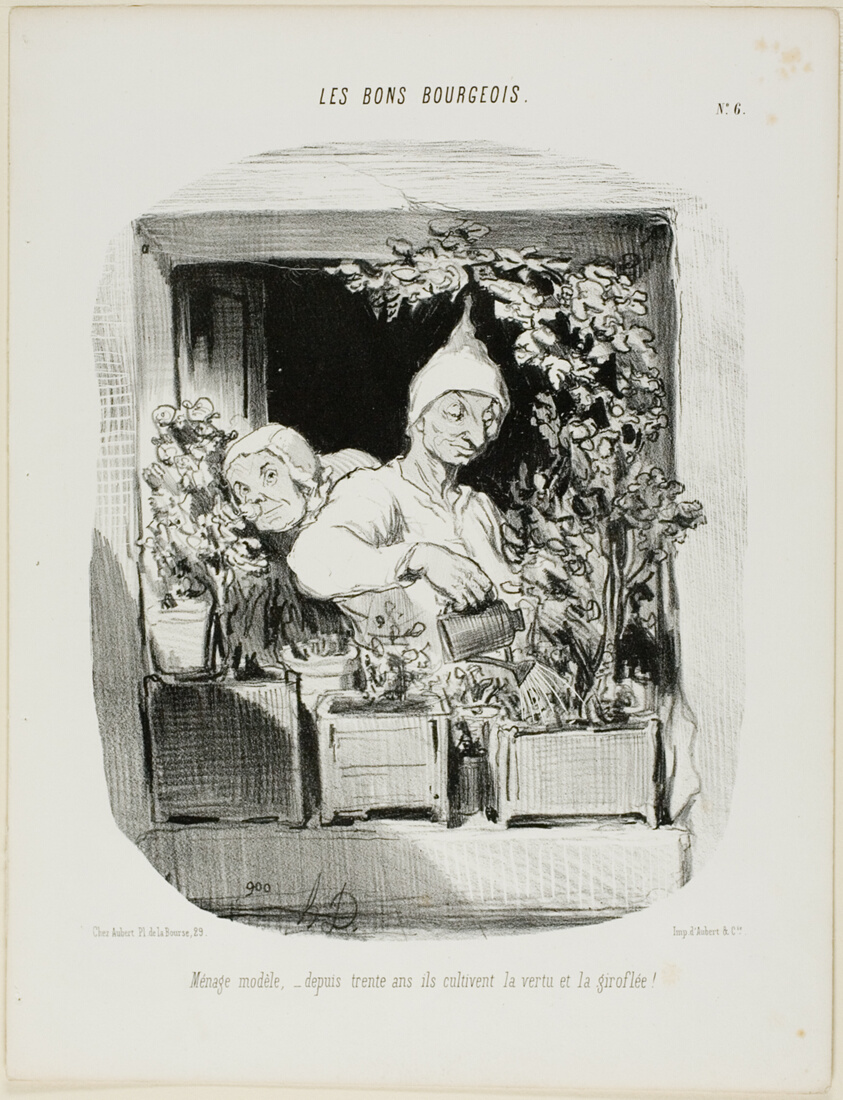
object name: Print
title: A Model Marriage: For Thirty Years They Have Cultivated Virtue and Carnations, plate six from Les Bons Bourgeois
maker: Honoré Victorin Daumier; French, 1808-1879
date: 1846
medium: Lithograph in black on white wove paper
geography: France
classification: lithograph; print; prints and drawing